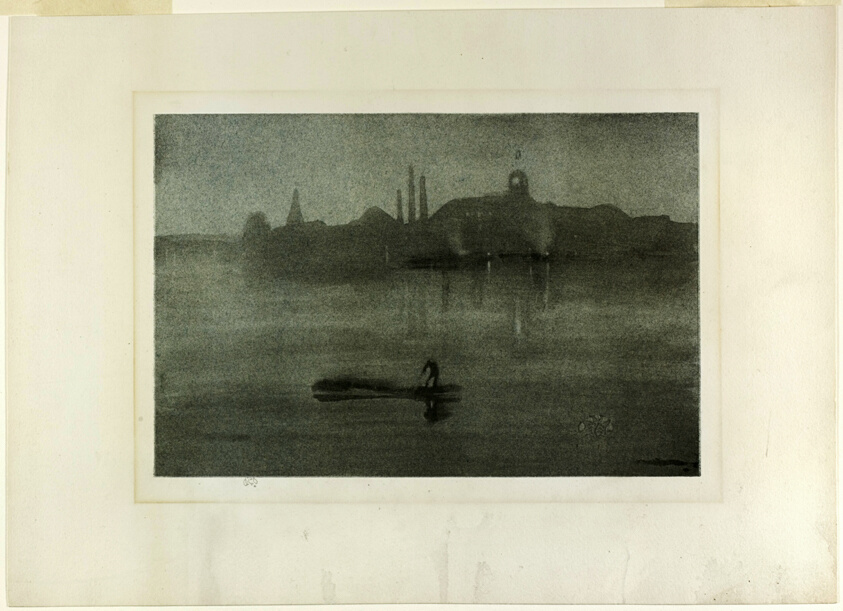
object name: Print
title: Nocturne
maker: James McNeill Whistler (American, 1834-1903)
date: 1878, published 1887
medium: Lithotint from a prepared half-tint ground, in black ink, with scraping, on blue laid chine laid down on ivory plate paper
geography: United States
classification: lithotint; lithograph; print; prints and drawing; paper